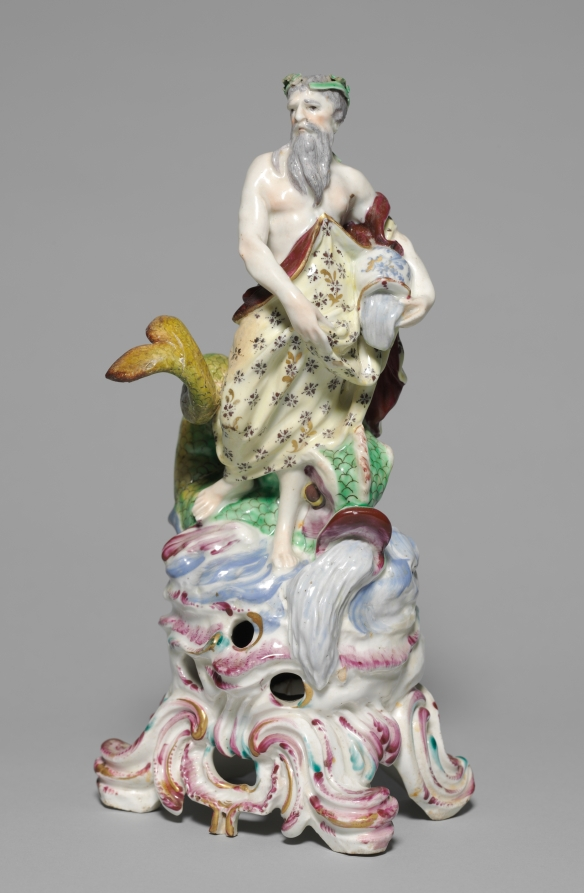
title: Figure of Water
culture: England, 18th century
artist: Bow Porcelain Factory (British)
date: 1755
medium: porcelain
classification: Ceramic